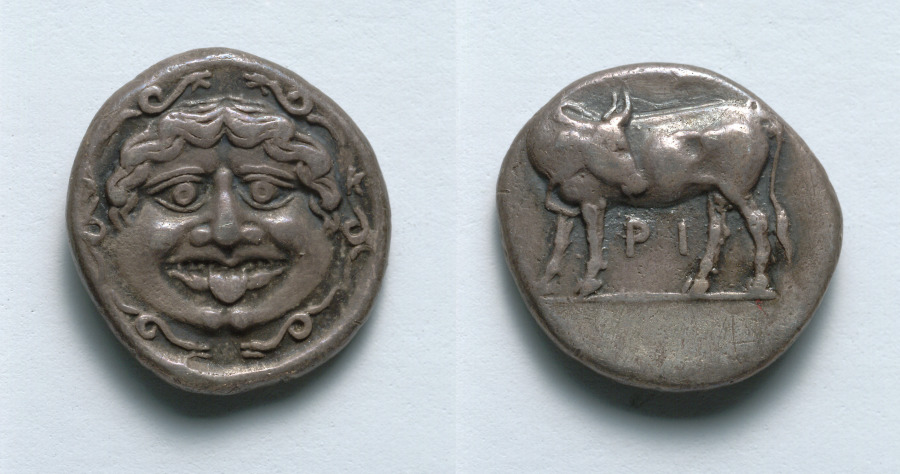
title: Hemidrachm: Gorgoneion (obverse); Bull (reverse)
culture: Greek, minted at Parion (Mysia)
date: c. 400 BCE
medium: silver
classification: Coins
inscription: [ΠΑ]ΡΙ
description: Like the coins of several other ancient cities, those of Parion feature the gorgoneion, or frontal face of Medusa, surrounded by serpents. On the reverse, a bull looks back across its body, with the letters Ρ Ι between its legs. More centrally struck examples preserve two more letters above—Π Α, to give ΠΑΡΙ (PARI), identifying the mint of Parion. The name recalls that of the Cycladic island Paros, one of Parion’s colonizers (with Miletos and Erythrae).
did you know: Ancient Parion (Latin Parium) lay in the region of Mysia, now northwest Turkey, on the Hellespont.